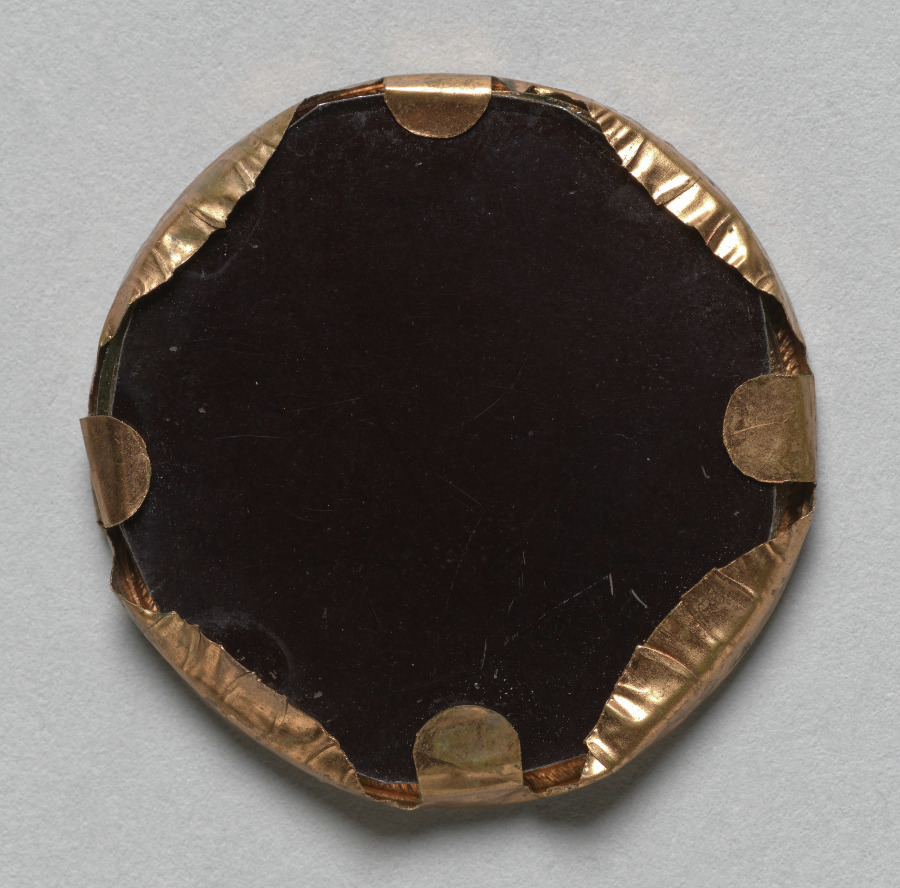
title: Portrait of a Young Woman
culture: America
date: c. 1855–60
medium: Tintype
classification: Photograph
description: It seemed a miracle that anyone could afford to have an accurate record of their own likeness or those of their loved ones. This portrait is an excellent example of the hundreds of thousands of portraits produced by commercial photographers in mid-nineteenth-century America. Small scale yet housed in an elaborately decorated thermoplastic case, it was intended to be carried by its owner or displayed on parlor tables or knickknack shelves.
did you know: During the first decades of photography, portraits far outnumbered every other type of image.